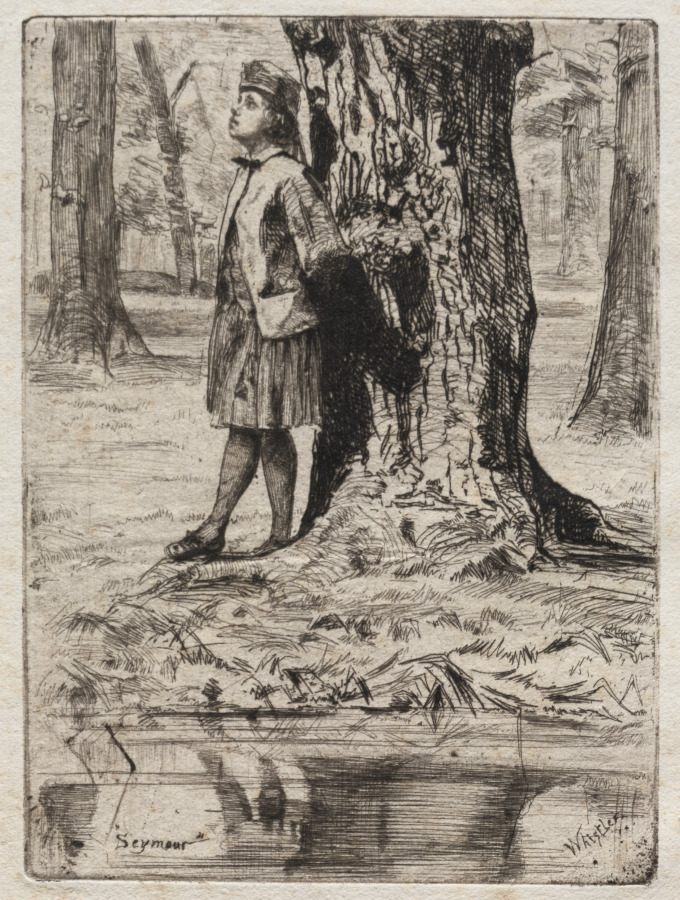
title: Seymour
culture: America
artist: James McNeill Whistler (American, 1834–1903)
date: 1858–59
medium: etching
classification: Print